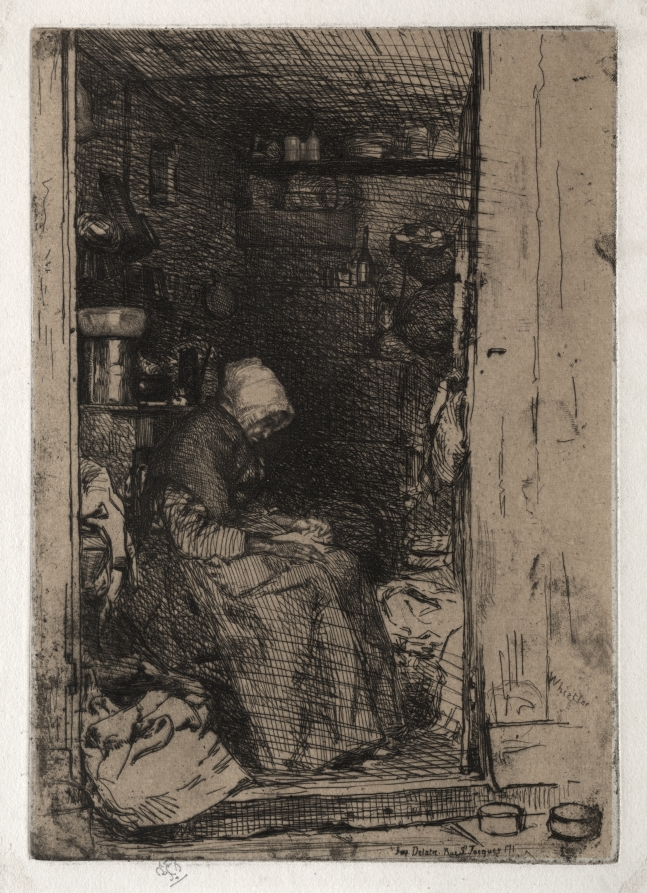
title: The Old Rag Woman, No. 10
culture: America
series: Twelve Etchings from Nature (The French Set)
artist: James McNeill Whistler (American, 1834–1903)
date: 1858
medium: etching with chine collé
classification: Print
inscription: Signed, lower right, in plate: Whistler [s reversed]; inscription, lower right, in plate: Imp. Delatre Rue St. Jacques. 171.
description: Whistler's first set of prints, the so-called French Set, included domestic and genre scenes, studies of friends and their children, and glimpses of shadowy figures in backstreets, alleyways, and anonymous interiors. His choice of subject and treatment reflected the American ex-patriot's awareness of modern realist trends in French art. This print, made after Whistler's return to Paris from the Rhine, describes an old woman silhouetted in a doorway, thrown into relief by a shadowed interior. Bent with fatigue, she sits among bundles of scavenged rags, gathered by the poor and sold to papermakers. The image resonates with the painful combination of aging and urban poverty.